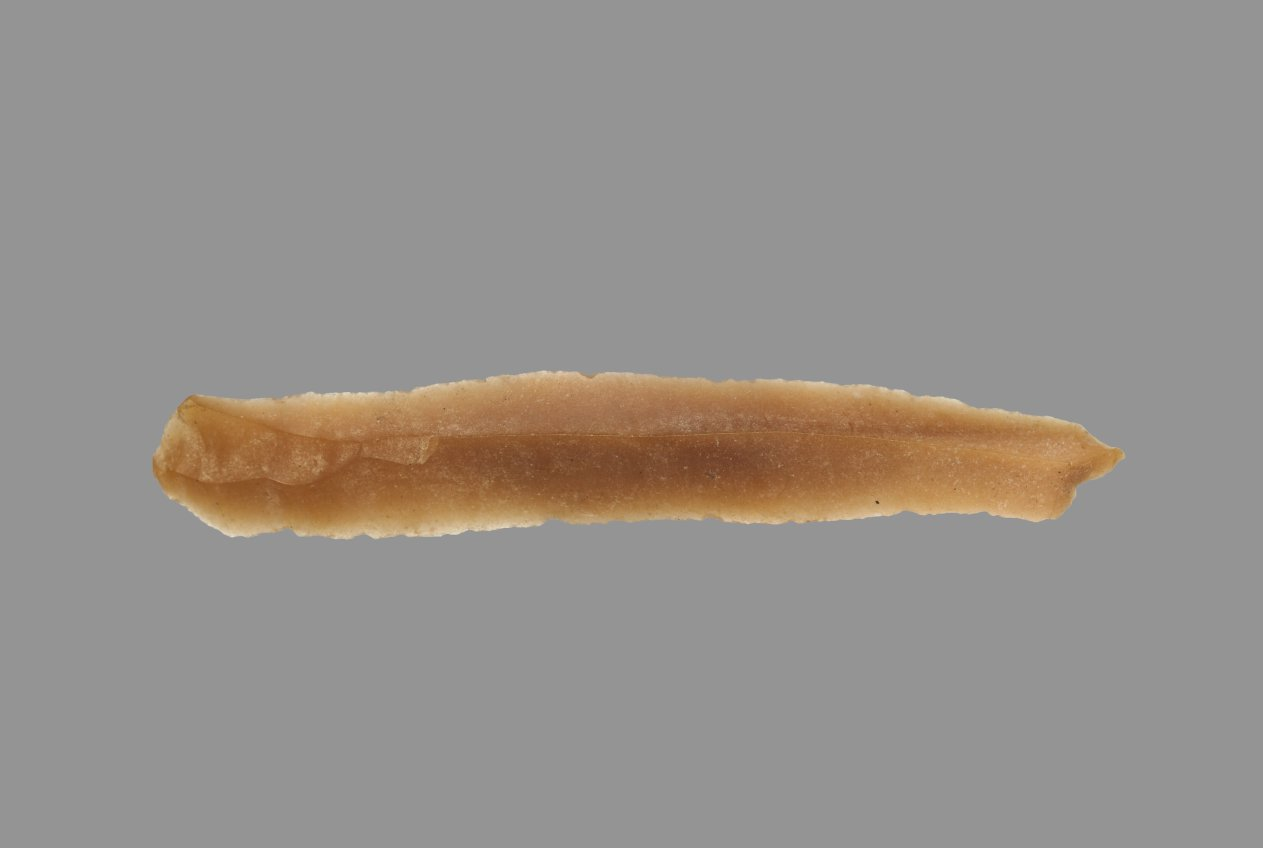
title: Sickle Blade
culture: Egypt, Middle Kingdom (2040–1648 BCE), Dynasty 12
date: 1980–1801 BCE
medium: flint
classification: Implements